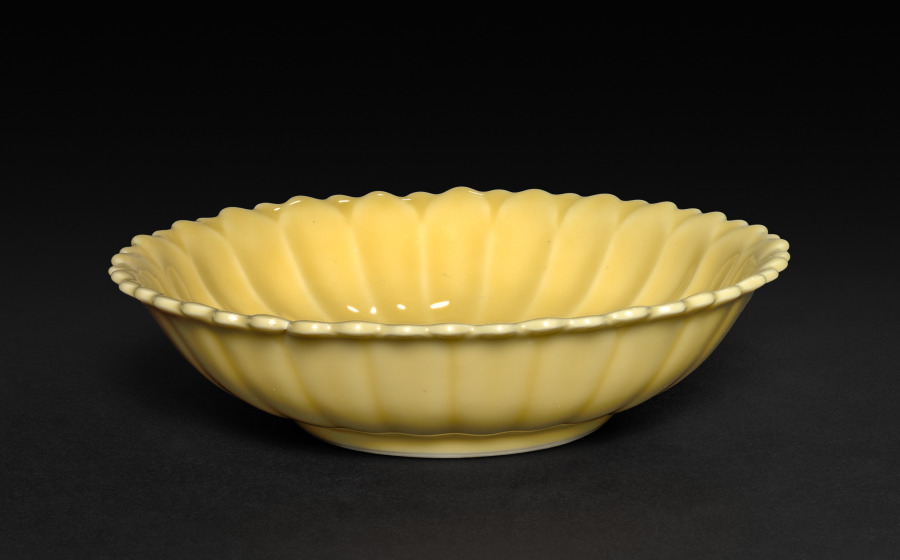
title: Chrysanthemum-Shaped Dish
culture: Japan, Taishō period (1912–26)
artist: Seifū Yohei IV (Japanese, 1872–1951)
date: 1914–46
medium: Porcelain with yellow glaze and molded decoration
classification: Ceramic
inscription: 清風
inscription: 清風造 【印】 清風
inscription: 【印】 清風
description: Like his father, Yohei IV also produced works with red or yellow monochrome glazes. His yellow-glazed works include this sweets bowl molded into the shape of a chrysanthemum, a set of five drinking cups CMA 2022.217, and a pair of sake pourers CMA 2022.216.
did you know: Seifū Yohei IV won a gold medal at the 1915 Panama-Pacific International Exposition in San Francisco for his ceramics.